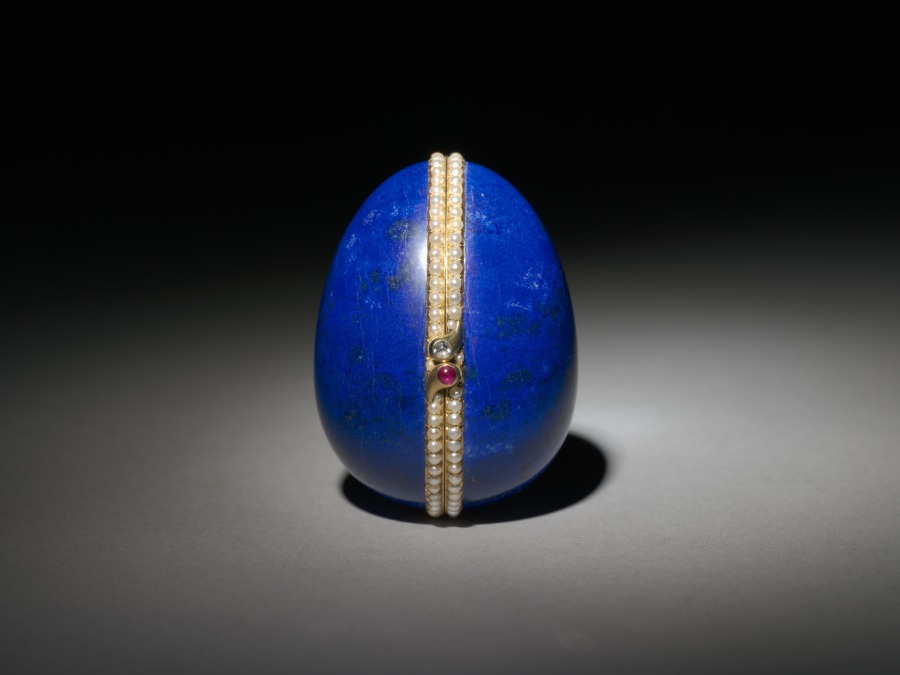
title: Lapis Lazuli Easter Egg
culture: Russia, St. Petersburg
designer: attributed to Peter Carl Fabergé (Russian, 1846–1920)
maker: attributed to House of Fabergé (Russian, 1842–1918)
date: c. 1885–90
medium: gold, enamel, lapis lazuli, pearls, diamonds, rubies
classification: Miscellaneous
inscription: Unmarked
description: Peter Carl Fabergé became the crown jeweler to the imperial court of Russia in 1885 after he produced the very first Easter egg for Tsar Alexander III to give to his wife, Empress Marie Feodorovna. Fabergé created his celebrated Easter eggs, symbols of rebirth and renewal, as gifts for the Russian imperial family every year until he had to leave the country in 1919 after the Russian Revolution. Made of gold and lapis lazuli from the Ural Mountains, this egg opens to reveal a compartment enameled to resemble an egg yolk, which contains yet another delightful surprise of an imperial crown holding a tiny ruby or pink sapphire on a chain.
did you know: This egg may have been made for one of the tsar's relatives very early in the run of imperial Easter egg production by Fabergé.